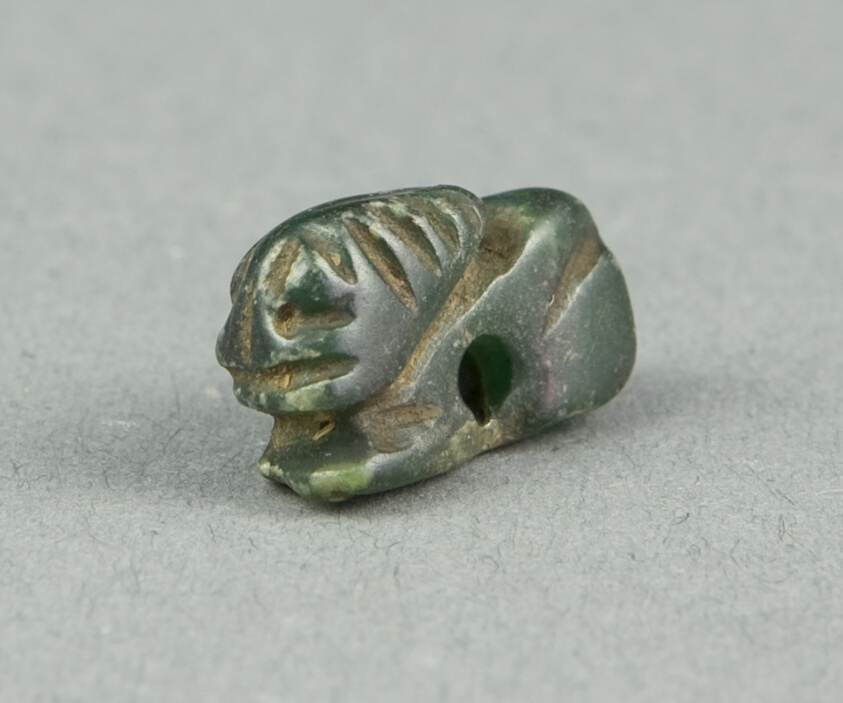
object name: Costume and Accessories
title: Amulet of a Sphinx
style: egyptian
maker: Egyptian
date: Middle Kingdom (?) (about 1700 BCE)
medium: Stone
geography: Egypt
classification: amulet; stone; jewelry; ancient art; costume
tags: sphinxes, lions